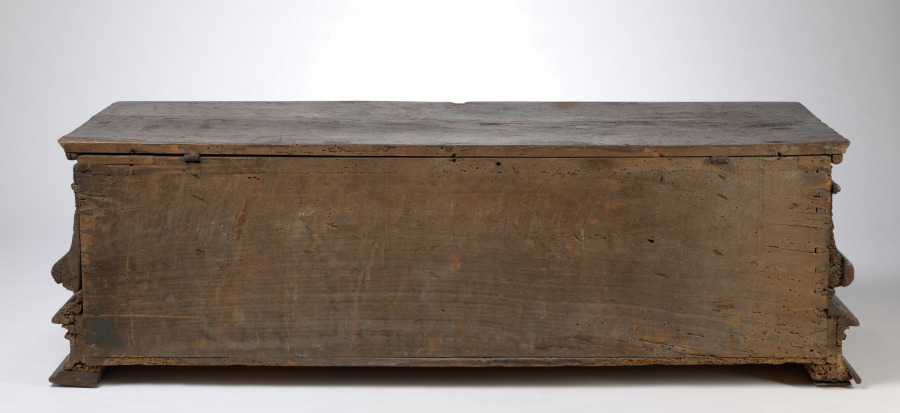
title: Cassone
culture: Italy, early 16th century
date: early 1500s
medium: walnut, painted and gilded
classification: Furniture and woodwork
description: Chests such as this were made in pairs and presented to young women on the occasion of their marriage. They not only provided storage space in the home for clothing and personal effects, but could also be used as a bench to sit on. It was not uncommon for any one room in a Renaissance palace to have several. This chest was in Savoy Castle, near Verzuolo, in the Piedmont region of northern Italy from the 1500s until 1922..